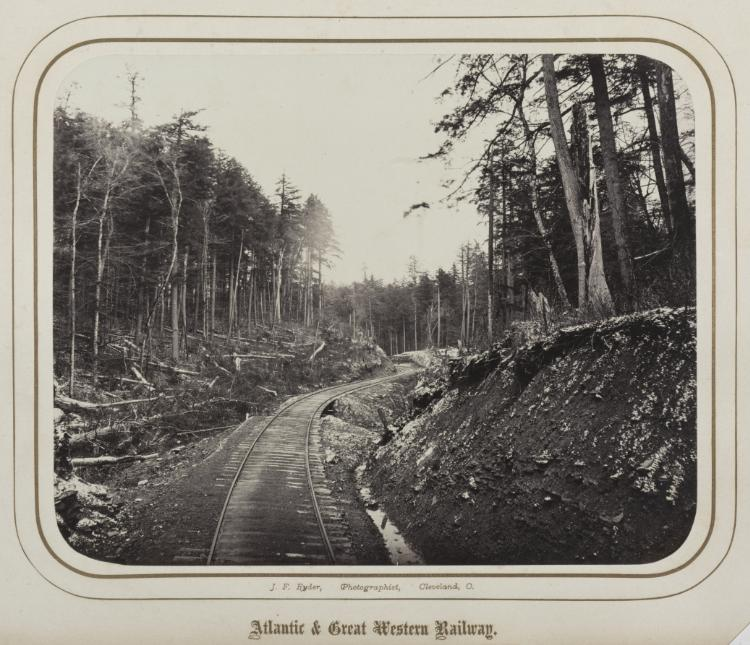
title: Untitled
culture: America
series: Atlantic and Great Western Railway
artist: James Fitzallen Ryder (American, 1826–1904)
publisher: Atlantic and Great Western Railway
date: 1862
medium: albumen print from wet collodion negative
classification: Photograph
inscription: Written in pencil on recto: "31"; in pencil on verso: "31"; "2500-"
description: Like other prominent photographers of the 1800s, Ryder, a Clevelander, undertook commissioned works from the expanding railroad industry to document the safety and convenience of railway travel, as well as to endorse resettlement on company-owned land and reassure investors. The serpentine track in this charming image winds its way through a dense forest, leading the viewer’s imagination to unexpected adventures.